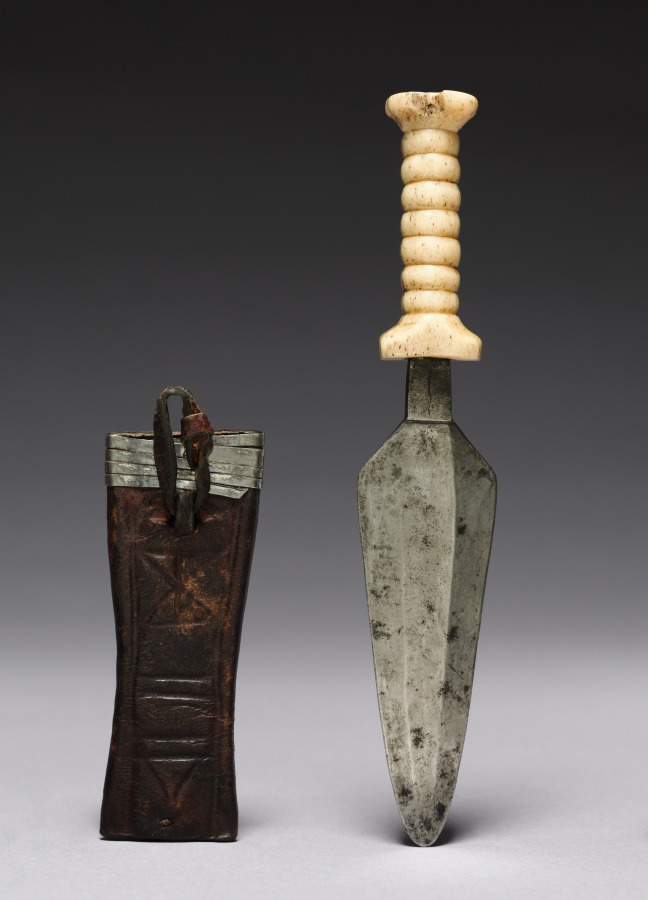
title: Dagger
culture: Africa, Central Africa, Democratic Republic of the Congo, Mangbetu-style maker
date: 1900s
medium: Iron, elephant ivory, leather, and tin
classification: Arms and Armor